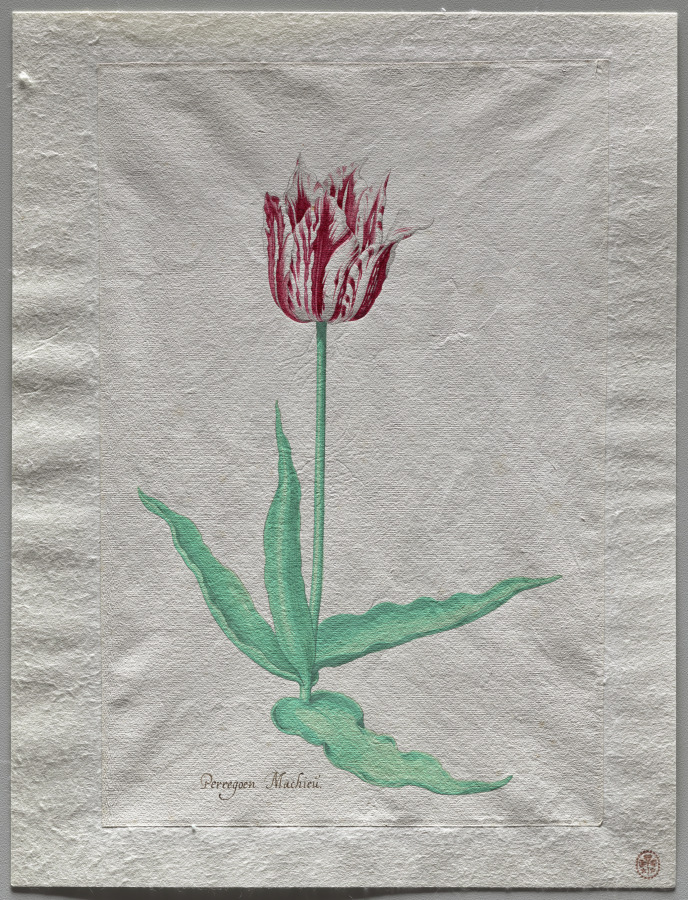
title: Study of a Tulip (Perregoen Machieu)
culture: Netherlands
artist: Pieter Holsteyn II (Dutch, c.1612–1673)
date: c. 1645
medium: Point of brush and transparent and opaque watercolors with traces of graphite and gum glazing on antique laid paper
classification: Drawing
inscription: Recto, lower right: small botanical stamp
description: This image of a tulip was made as part of a tulip book used as a grower’s marketing tool during the so-called tulip mania, a speculative bubble in 17th-century Holland, when ten tulip bulbs could cost more than a stately Amsterdam canal house. The striations on the tulip, which were caused by a virus in the bulb, made it especially valuable. Pieter Holsteyn II was one of many artists in the Netherlands at the time who specialized in botanical illustration.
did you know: In 17th-century Holland, some tulip bulbs were as expensive as a stately Amsterdam canal house.